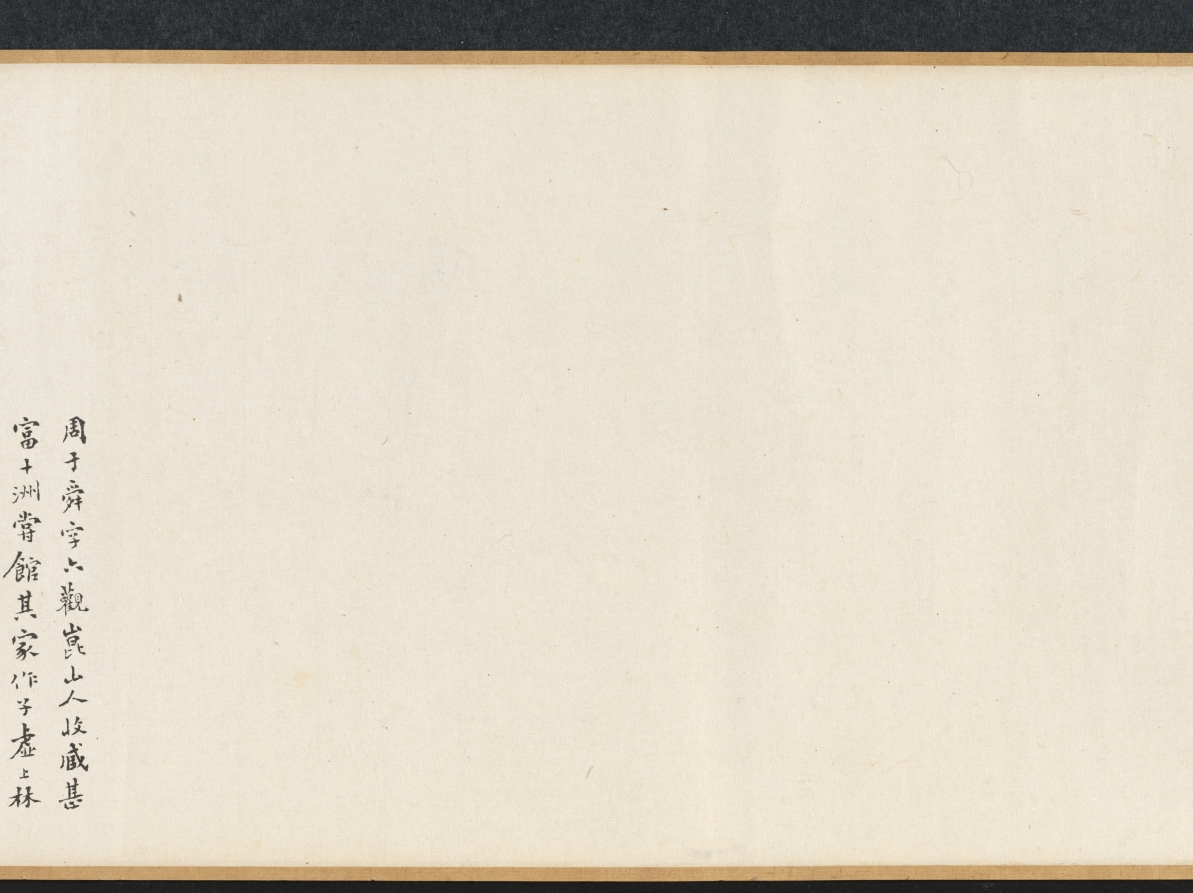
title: Zhao Mengfu Writing the Heart (Hridaya) Sutra in Exchange for Tea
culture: China, Ming dynasty (1368–1644)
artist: Qiu Ying (Chinese, 1494–1552)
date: 1542–43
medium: handscroll, ink and light color on paper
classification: Painting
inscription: Inscription accompanying text of "Heart" sutra, by Wen Zhengming 文徵明 (1470-1559): Zhengming 徵明, written in a boat at Kunshan 崑山, on the twenty-first day of the ninth month, in the renyin 壬寅 year, the twenty-first year of the Jiajing era [1542].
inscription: Colophon by Wang Shih-mou: Chou Yü-shün [Feng-lai] of K'un-shan was a scholarly, refined connoisseur of antiquities. He had acquired the poem written by Chao Ch'eng-chih [Chao Meng-fu] about the exchage of tea for Chao's calligraphy of the Prajna sutra. But the sutra itself, also written by Chao Meng-fu, is lost. He therefore asked Ch'iu Shih-fu [Ch'iu Ying] to do a painting and had Wen Cheng-ming, the artist-in-attendance, write the Hridaya Sutra in the "small, regular" style for replacement. Both works are so excellent that even Chao Meng-fu himself would certainly applaud if he should be reborn to see them. I, Shih-mou, had gotten possession of this scroll from the family of Chou Yü-shün, and since it was so wonderfully matched with one of the treasures in my collection. the Hridaya Sutra written by Chao Meng-fu for Priest Li in "running script," like the reuniting of two halves of a jade pi, I completed the scroll with the several colophons written for the "tea-exchange" poem. I did this because the painting of Ch'iu Ying and the calligraphy of Wen Cheng-ming are definitely masterpieces by themselves with absolutely no need to depend on any of the colophons written for the Chao Meng-fu poem. Furthermore, the two sons of Wen Cheng-ming, Shou-ch'eng [Wen P'eng] and Hsiu-ch'eng [Wen Chia]. have each written a colophon explaining the reason for replacing the calligraphy. As their writings are both acceptable for high standard, I didn't want to throw them away. [So by separating these into two scrolls] I was able to get two complete works of art in one clever stroke. I was quite pleased with myself, and hope that those who see this scroll shall not get suspicious because of the missing colophons. Wang Shih-mou wrote in his Jih-sun-chai study, on the first day of the tenth month, in the chia-shen year of the Wan-li era [1584].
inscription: Colophon by Wen P'eng: I-shao [Wang Hsi-chi] wrote in exchange for a flock of geese. Su Tung-po wrote in exchange for meat. Both episodes have become legends of a thousand years. Sung-hsüeh [Chao Meng-fu] "teased" Priest Kung for tea, and the story was immediately immortalized in the poems by all the famous scholars of the times. Indeed, how could one say his humor and elegance are not equal to the ancient worthies? Unfortunately, the poetry has survived but the writing of the sutra is lost. Yü-shün [Chou Feng-lai] therefore asked my father to make up the writing and so here is the complete work of art. Respectfully inscribed by Wen P'eng in the mid-summer of 1543.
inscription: Colophon by Wen Chia: Sung-hsüeh [Chao Meng-fu], in exchanging tea leaves for his writing of the Prajna, had put himself in the company of Yu-chün [Wang Hsi-chih] who exchanged geese for his writing of the Huang-t'ing sutra [the Yellow Chamber, or the Wai-ching ching, a Taoist text attributed to the Yellow Emperor]. However, was this romantic and cultivated gesture really intended for such small things? Actually, he was only proud that the excellence of his calligraphy had made him worthy to be the successor of the Ch'in Dynasty master. Since, very unfortunately, Chao Meng-fu's writing [of the Prajna] was already lost, my father therefore agreed to replace it, and did the calligraphy in the style of the Yellow Chamber. In addition, Yu-shün [Chou Feng-lai] had asked Mr. Ch'iu Shih-fu [Ch'iu Ying] to do a painting of the sutra writing story in the style of Li Lung-mien at the head of the scroll. Now it would seem the entire episode should go down in history for immortality. Respectfully recorded by Wen Chia, on the eighth day of the eighth month, in the year of k'uei-mao [1543]. trans. WKH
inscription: 4 colophons and 23 seals: 1 colophon, dated 1543, and 2 seals of Wen Peng (1498-1573); 1 colophon, dated 1543, and 2 seals of Wen Chia (1501-1583); 1 colophon, dated 1584, and 3 seals of Wang Shih-mou (1536-1588); 2 seals of Chou Feng-lai (16th c.); 3 seals of Sung Lo (1634-1713); 5 seals of the Ch'ien-lung emperor (r. 1736-95); 1 colophon, dated 1902, and 1 seal of Fei Nien-tz'u (1885-1905); 4 seals of Wan-go H. C. Weng (b. 1918); 1 seal unidentified.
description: The Yuan dynasty calligrapher Zhao Mengfu (1254–1322) is said to have transcribed the Heart Sutra for a certain priest named Li in exchange for tea. Later, during the Ming dynasty, the professional painter Qiu Ying from Suzhou painted this scene for his patron. Here, Zhao Mengfu holds a brush and has a piece of paper laid out before him. On the table is an ink stone, an ink stick, and a small water dropper. Drops of water would dissolve the ink stick into liquid ink when it was ground on the flat square stone.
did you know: Qiu Ying was born to a peasant family, but his natural talent led him to a successful career as a professional painter with wealthy patrons.